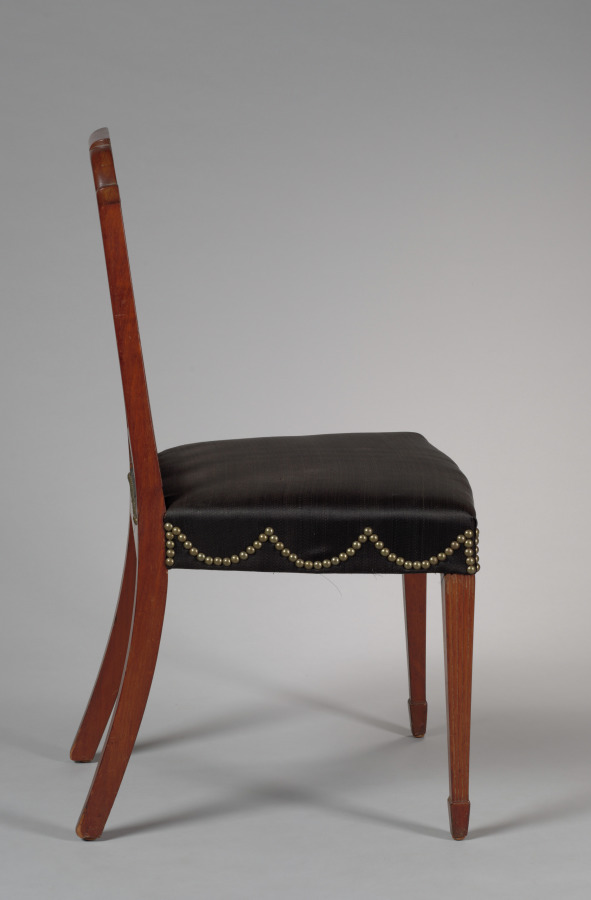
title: Side Chair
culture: America, Massachusetts, Boston, late 18th Century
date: c. 1790–1800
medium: mahogany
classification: Furniture and woodwork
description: Chairs of this or similar design seem to have been made by several Boston cabinetmakers. This chair may have belonged to one or more members of the distinguished Derby family or West family-or both-of nearby Salem, Massachusetts.